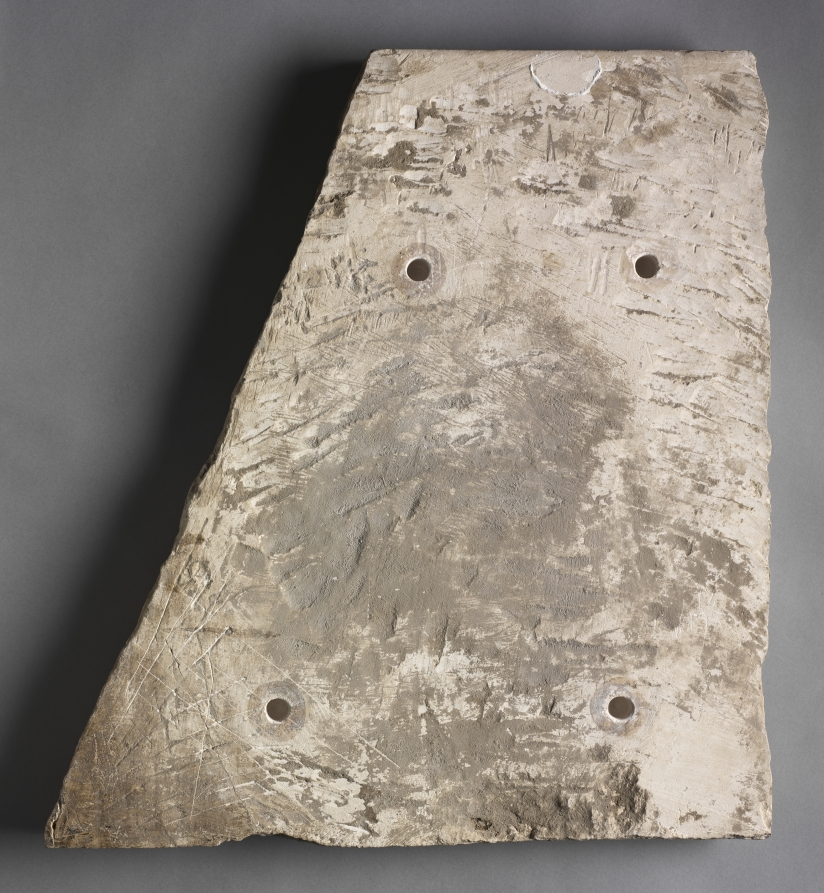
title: Temple Relief of a Deity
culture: Egypt, Late period (715–332 BCE), Dynasty 30–Greco-Roman period (332 BCE–395 CE), Ptolemaic dynasty (305–30 BCE)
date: 360–246 BCE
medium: limestone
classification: Sculpture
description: The almond-shaped eye, snub nose, full cheeks, smiling mouth, and ball.shaped chin are characteristic of Dynasty 30 and the early Ptolemaic Dynasty, when a bolder, fleshier, more three-dimensional style of modeling was introduced. A favorite form of temple decoration during this period was a row of seated deities. This figure was the last in a row of gods facing right, for directly behind him is a dividing line and the slight remains of the vulture headdress, wig, and shoulder of a seated goddess, evidently the last in a row facing the opposite direction. At either end of the complete scene was probably a standing figure of the king presenting offerings.